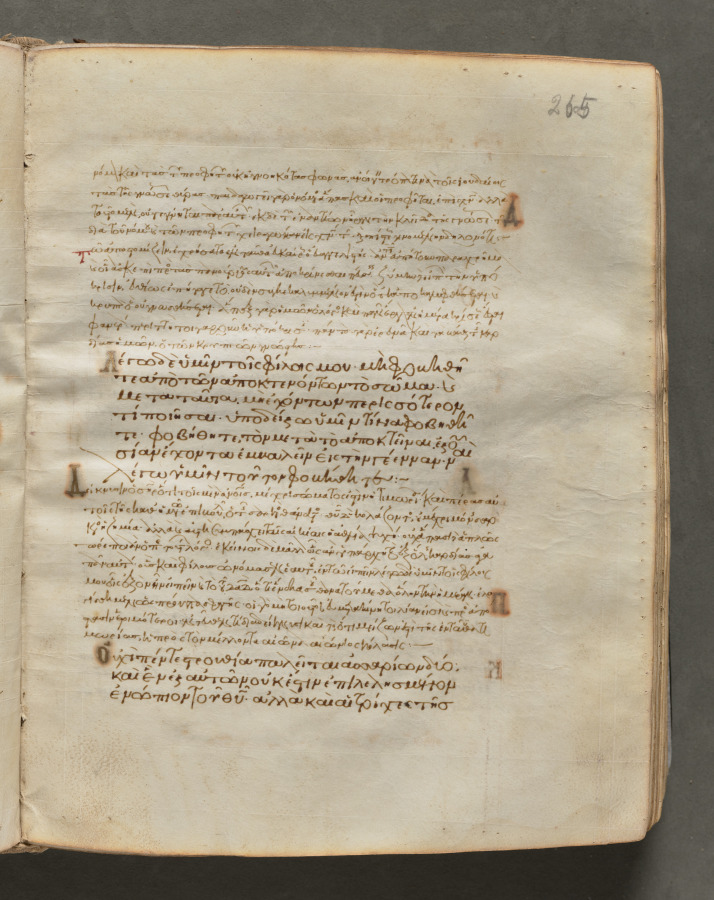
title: Text, folio 265 (recto), from a Gospel Book with Commentaries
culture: Byzantium, Constantinople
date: c. 1000–1100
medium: ink, tempera, and gold on vellum; leather binding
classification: Bound Volume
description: Each of the four gospels in this book opens on a page with brilliantly illuminated borders depicting the author of the text as well as birds—principally peacocks, symbols of the immortality of the soul—and fountains, representing the fountain of life and the salvation of the soul. This volume consists of 428 leaves with texts in Greek. Its level of sophistication suggests that it was probably written and decorated in a monastery in Constantinople.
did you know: Gospel books were carried in procession through Byzantine churches.